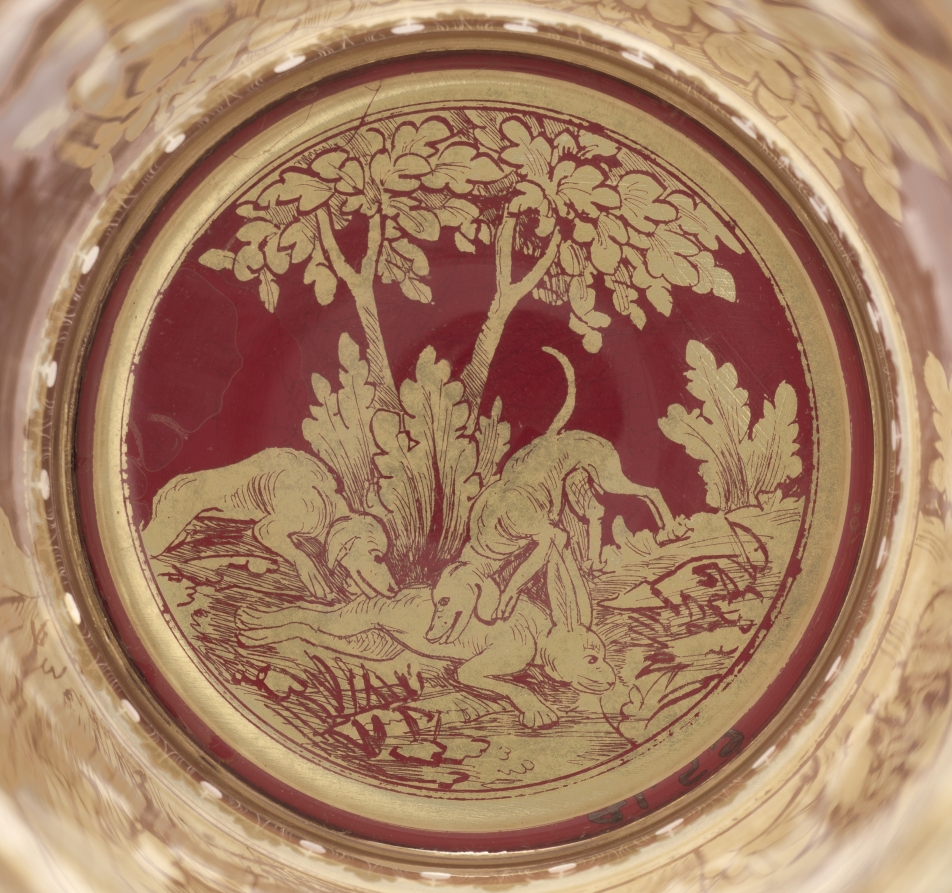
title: Tumbler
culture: Bohemia, 18th century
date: c. 1730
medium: zwischengoldglas (glass)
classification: Glass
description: Small beakers, or tumblers, were used to drink various types of spirits, cordials, and fortified wines, like sherry and port. “Gold between glass” (Zwischengoldglas) was a labor-intensive and costly technique practiced in Bohemia (present-day Czech Republic) and Austria in the 1700s. A gold-leaf design was affixed between two glass vessels that were then precisely fit together and fused. In this example, the gold leaf portrays a boisterous hunting scene. When the glass is tipped and emptied, the interior reveals that two hunting dogs have killed a hare.